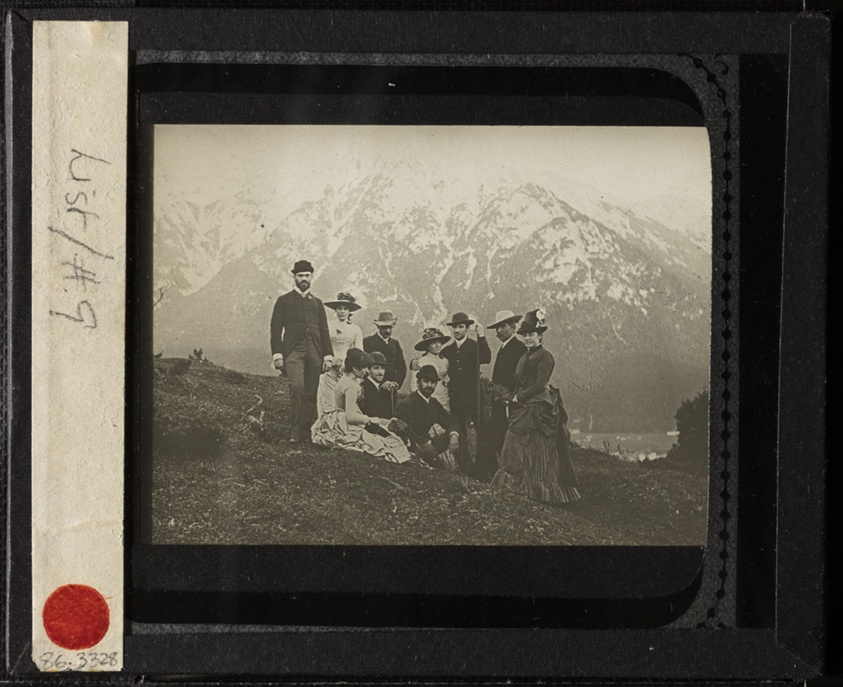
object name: Photograph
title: Family & Friends at Mittenwalk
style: 19th century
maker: Alfred Stieglitz (American, 1864–1946)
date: c. 1884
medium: Lantern slide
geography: United States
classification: lantern slide (glass); negative/transparency; photography; photograph